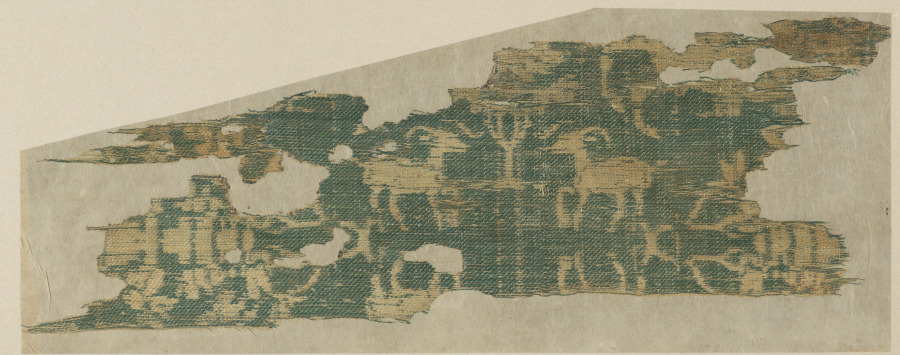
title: Fragment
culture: China, 7th - 8th century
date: 600 – 799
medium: compound twill, silk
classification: Textile